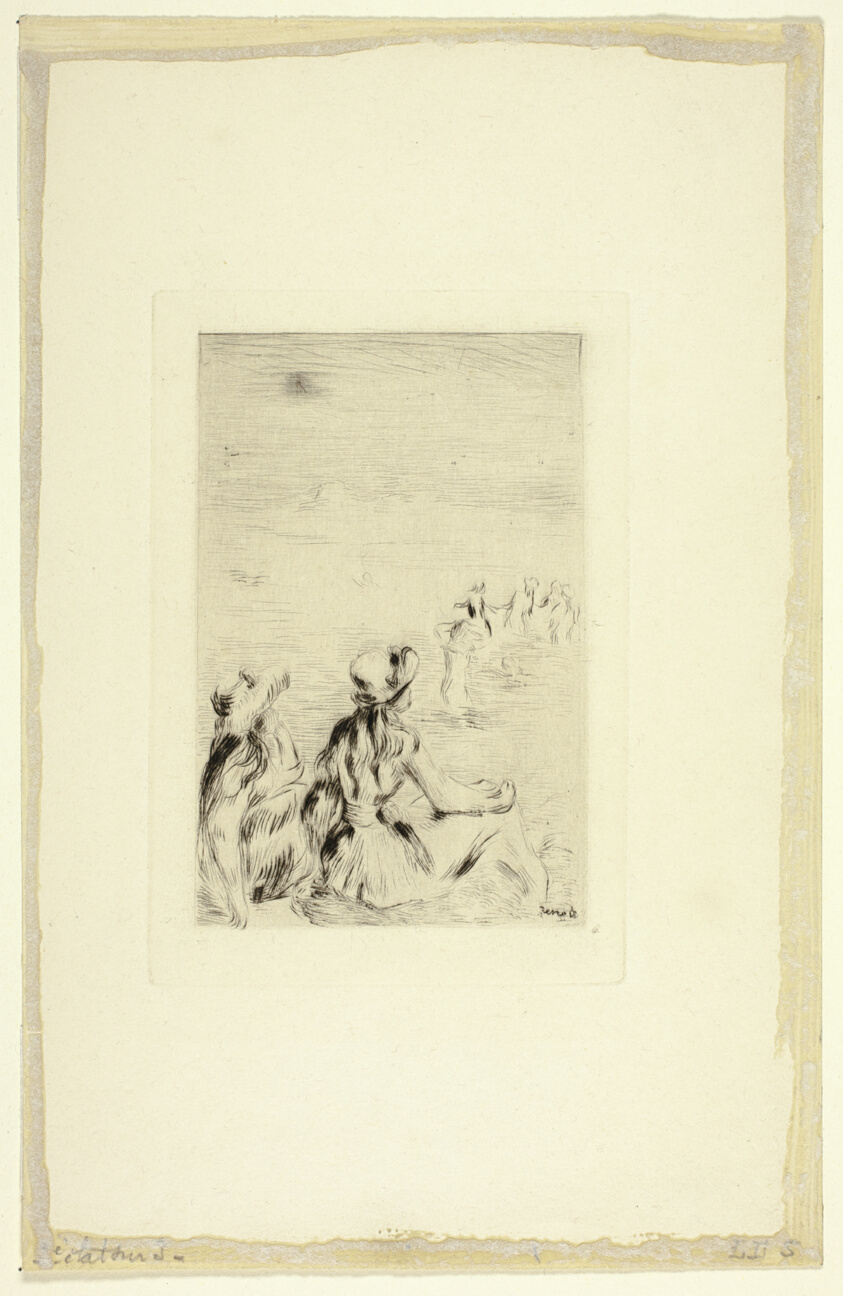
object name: Print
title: Children on the Beach, Berneval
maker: Pierre Auguste Renoir; French, 1841-1919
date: c. 1892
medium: Etching and drypoint on cream wove paper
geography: France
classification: drypoint; print; prints and drawing